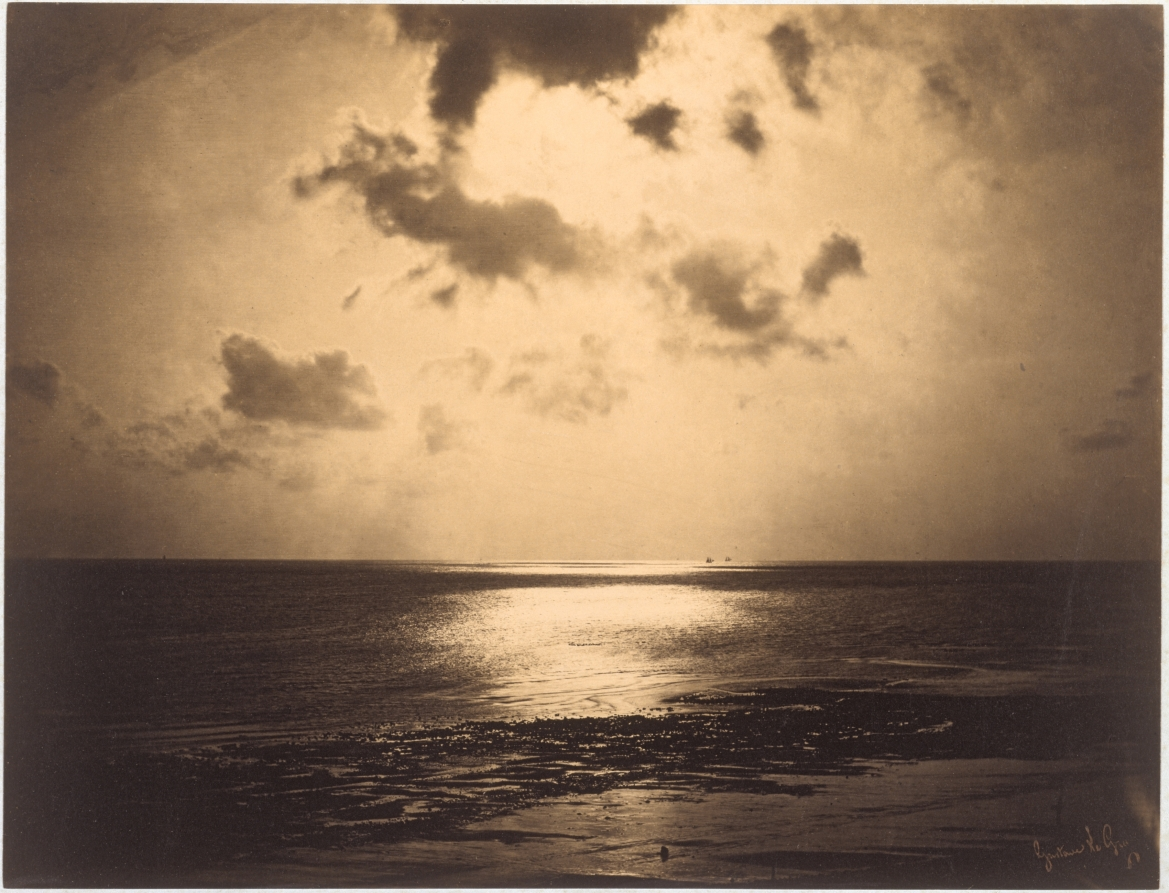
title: An Effect of the Sun, Normandy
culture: France, 19th century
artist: Gustave Le Gray (French, 1820–1884)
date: c. 1856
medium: albumen print from wet collodion negative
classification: Photograph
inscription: Written in red ink on recto: "Gustave Le Gray"; on label on recto: "All titles Effet du [sic] Soleil Ocean No. 23"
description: Exploring the dramatic effects of sunlight, clouds, and water, Gustave Le Gray gained immediate recognition for his landmark photographs of the Mediterranean Sea and the English Channel taken between 1856 and 1858. At this time photographic emulsions were not equally sensitive to all colors of the spectrum, making it impossible to achieve a proper exposure for both sea and sky in a single image. Thus, for may of his seascapes Le Gray printed two negatives on a single sheet of paper, a technique called combination printing. One negative was taken of the water and the other of the sky. The overlap often apparent in such multiple negative images is not visible in this skillfully executed print.